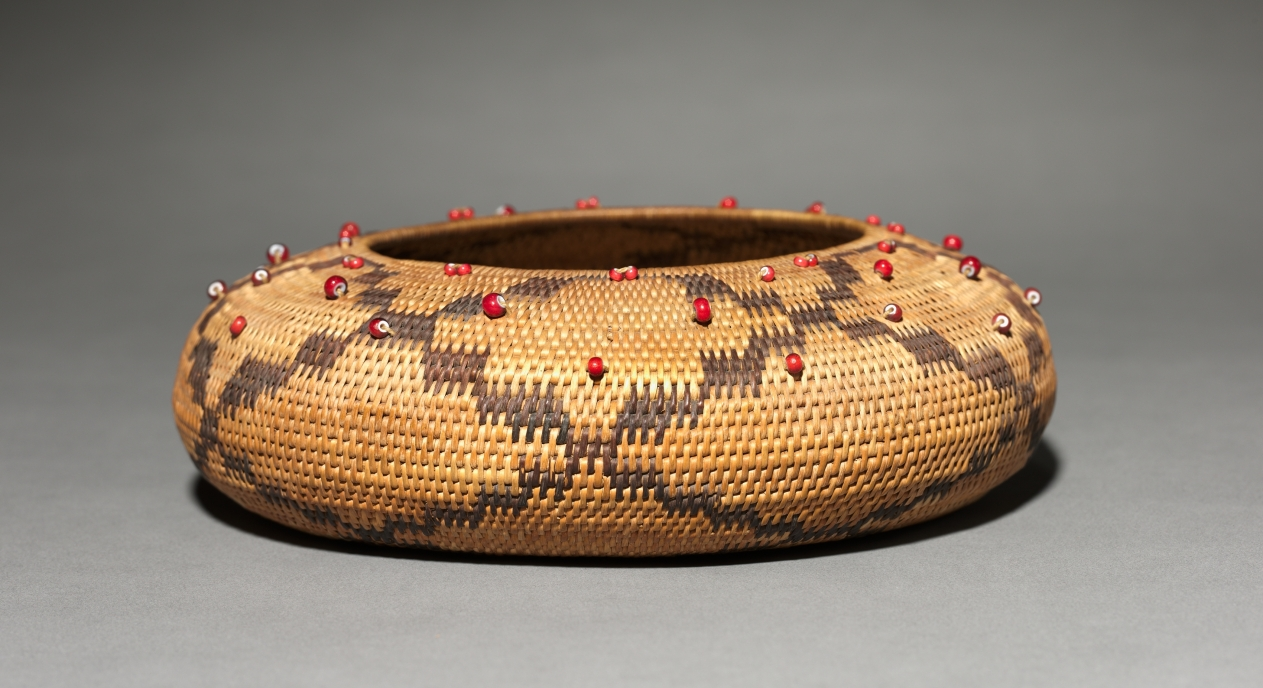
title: Trinket Bowl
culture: California, Pomo, Late 19th- Early 20th century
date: c. 1895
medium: Bulrush, Sedge, with beads; coiled (1 rod)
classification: Basketry